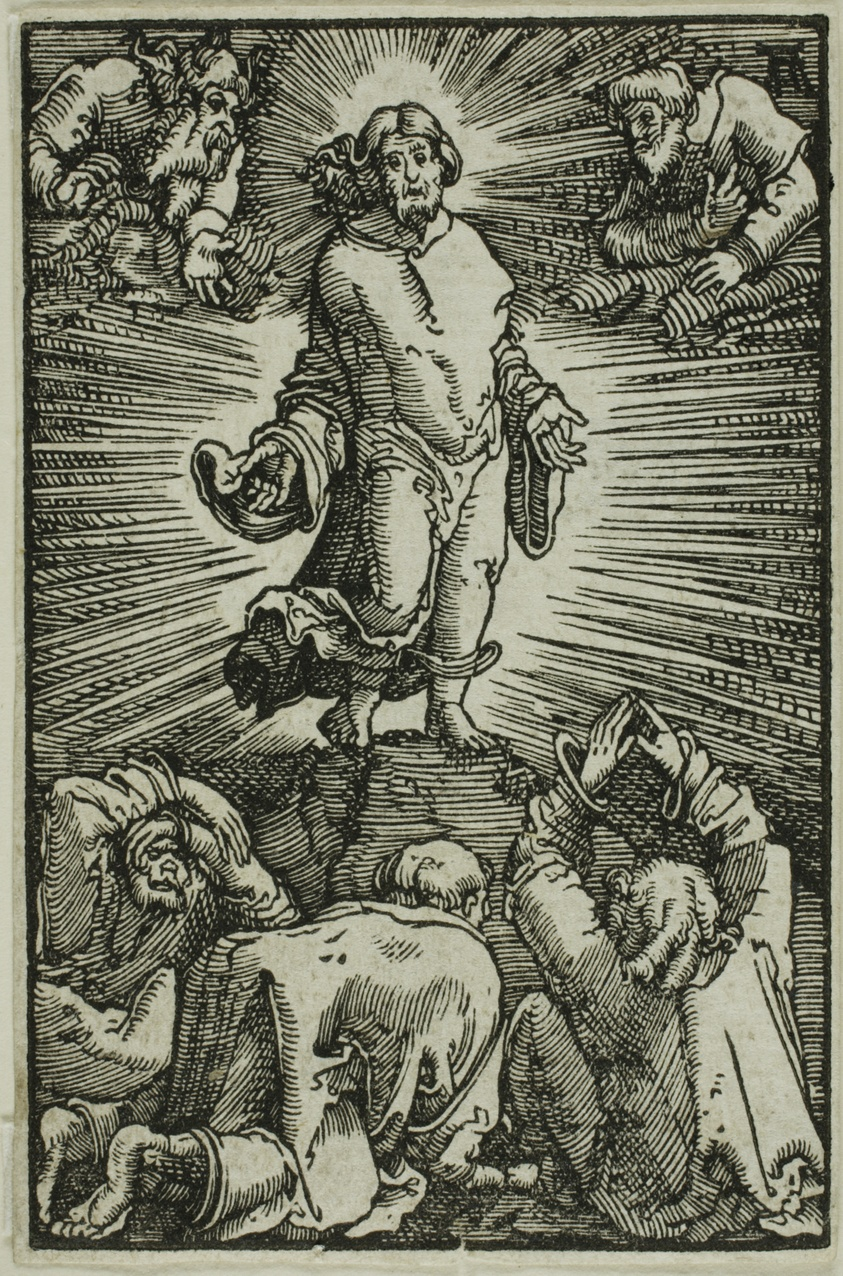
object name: Print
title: The Transfiguration, from The Fall and Redemption of Man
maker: Albrecht Altdorfer (German, c.1480-1538)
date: 1513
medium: Woodcut in black on ivory laid paper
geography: Germany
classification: wood engraving; print; prints and drawing